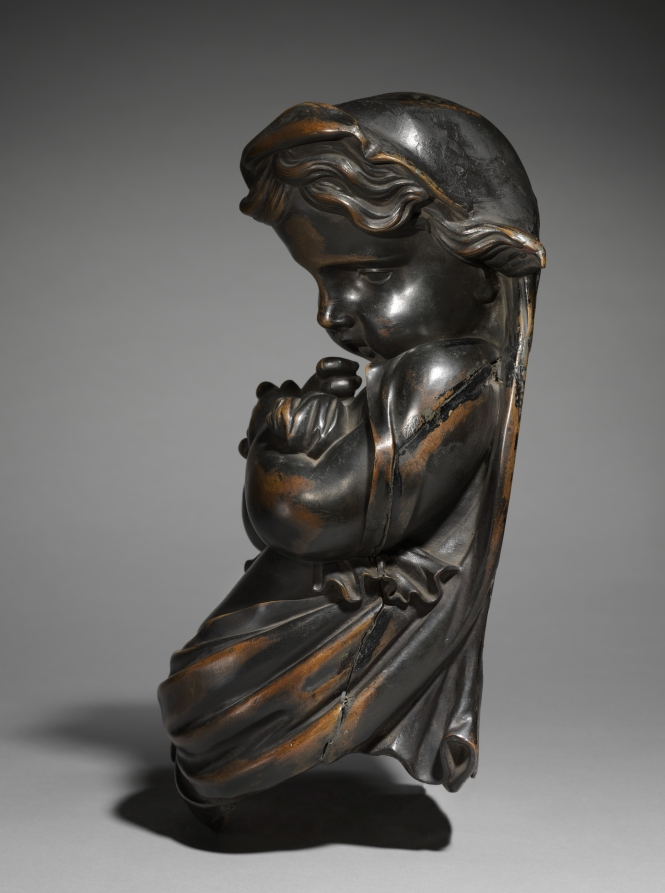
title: Winter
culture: France, 19th century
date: 1800s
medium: bronze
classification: Sculpture